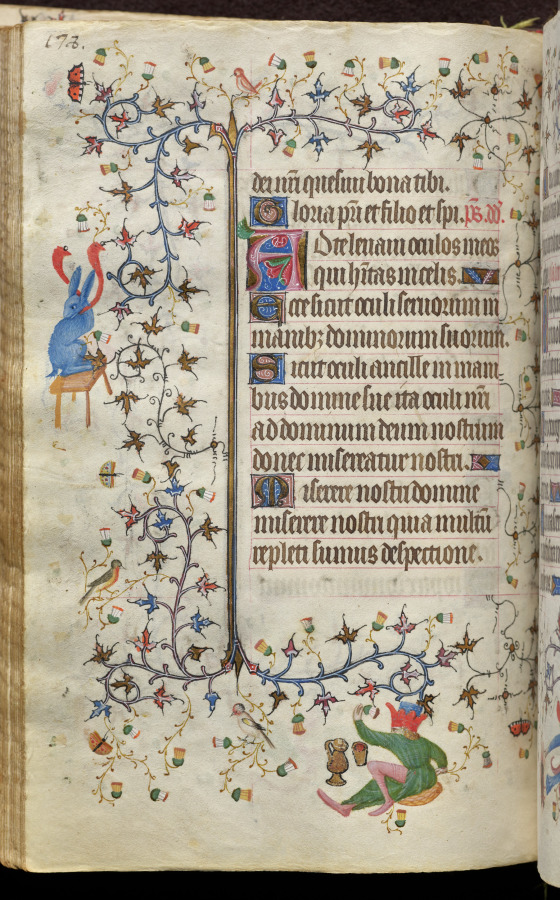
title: Hours of Charles the Noble, King of Navarre (1361-1425): fol. 89v, Text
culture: France, Paris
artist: Master of the Brussels Initials and Associates (French)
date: c. 1405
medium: ink, tempera, and gold on vellum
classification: Bound Volume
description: This precious book was highly prized by its owner, Charles III, King of Navarre, a French-born prince whose coat of arms is painted on 20 folios. Charles visited Paris on numerous occasions and likely acquired this volume there in 1404. Paris was the center of the European book trade at the time and attracted illuminators from many parts of Europe. This manuscript represents one of the most remarkable fusions of French and Italian taste in book illumination. Though conforming to Parisian standards, most of the book’s major miniatures are the work of the Brussels Initials Master, an Italian illuminator who previously worked in Bologna and Padua.